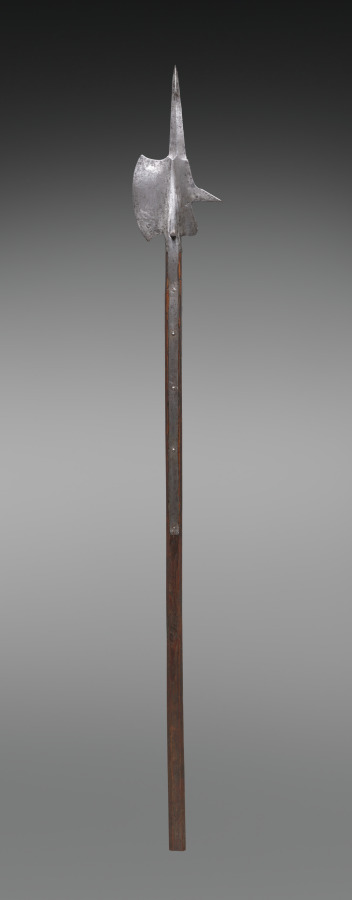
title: Halberd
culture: Switzerland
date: 1600s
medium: steel; new rectangular wood haft with planed corners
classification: Arms and Armor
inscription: IP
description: The halberd was a staff weapon favored by European infantries (foot soldiers) of the 1400s and 1500s for its versatility and deadly effect. The word halberd comes from the German words Halm (staff) and Barte (axe). The halberd is, in fact, an axe that served multiple functions: the axe blade was used for hacking, the spike for thrusting, and the beak for piercing plate armor or for pulling a knight from his saddle. The halberd was used by shock troops (those who lead an attack) and by Swiss and German mercenaries. After about 1550, the halberd gradually became less functional. Its large blade provided space for coats of arms and insignia. By the late 1500s, the parade halberd had become a ceremonial weapon for palace guards.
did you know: The earliest known mention of the halberd is believed to be by the Swiss poet Konrad von Würzburg (d. 1287) who wrote about them in his History of the Trojan War.